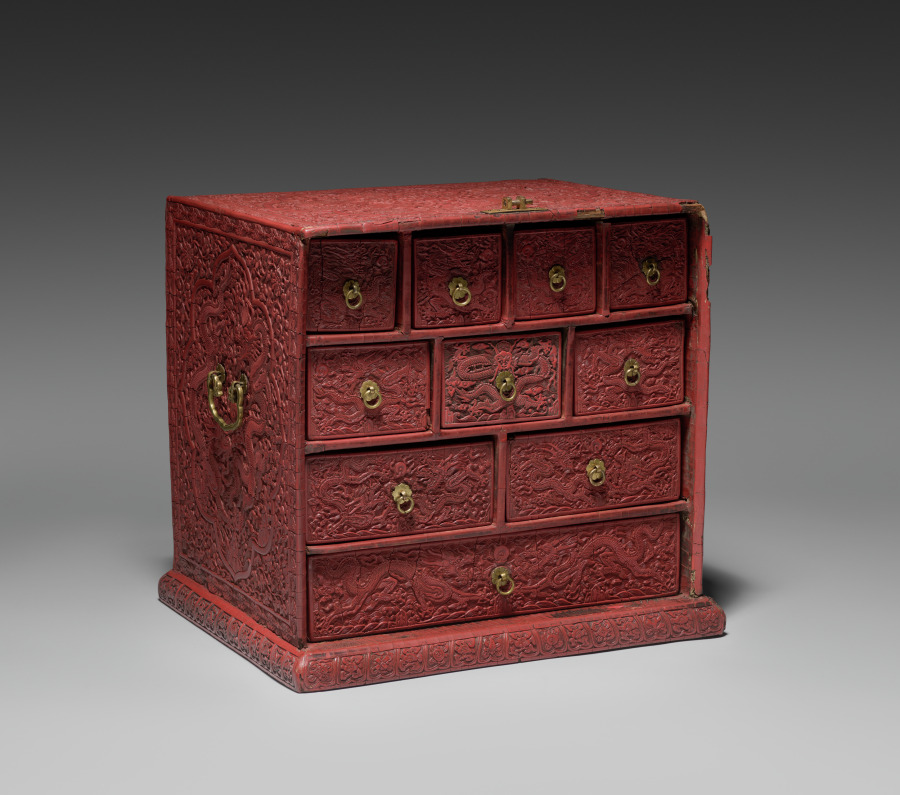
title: Tihong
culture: China, Ming dynasty (1368-1644), Wanli reign (1572-1620)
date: 1585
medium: carved cinnabar lacquer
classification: Lacquer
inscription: 大明萬曆乙酉年製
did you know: An inscription on the base of the chest dates it to 1585.